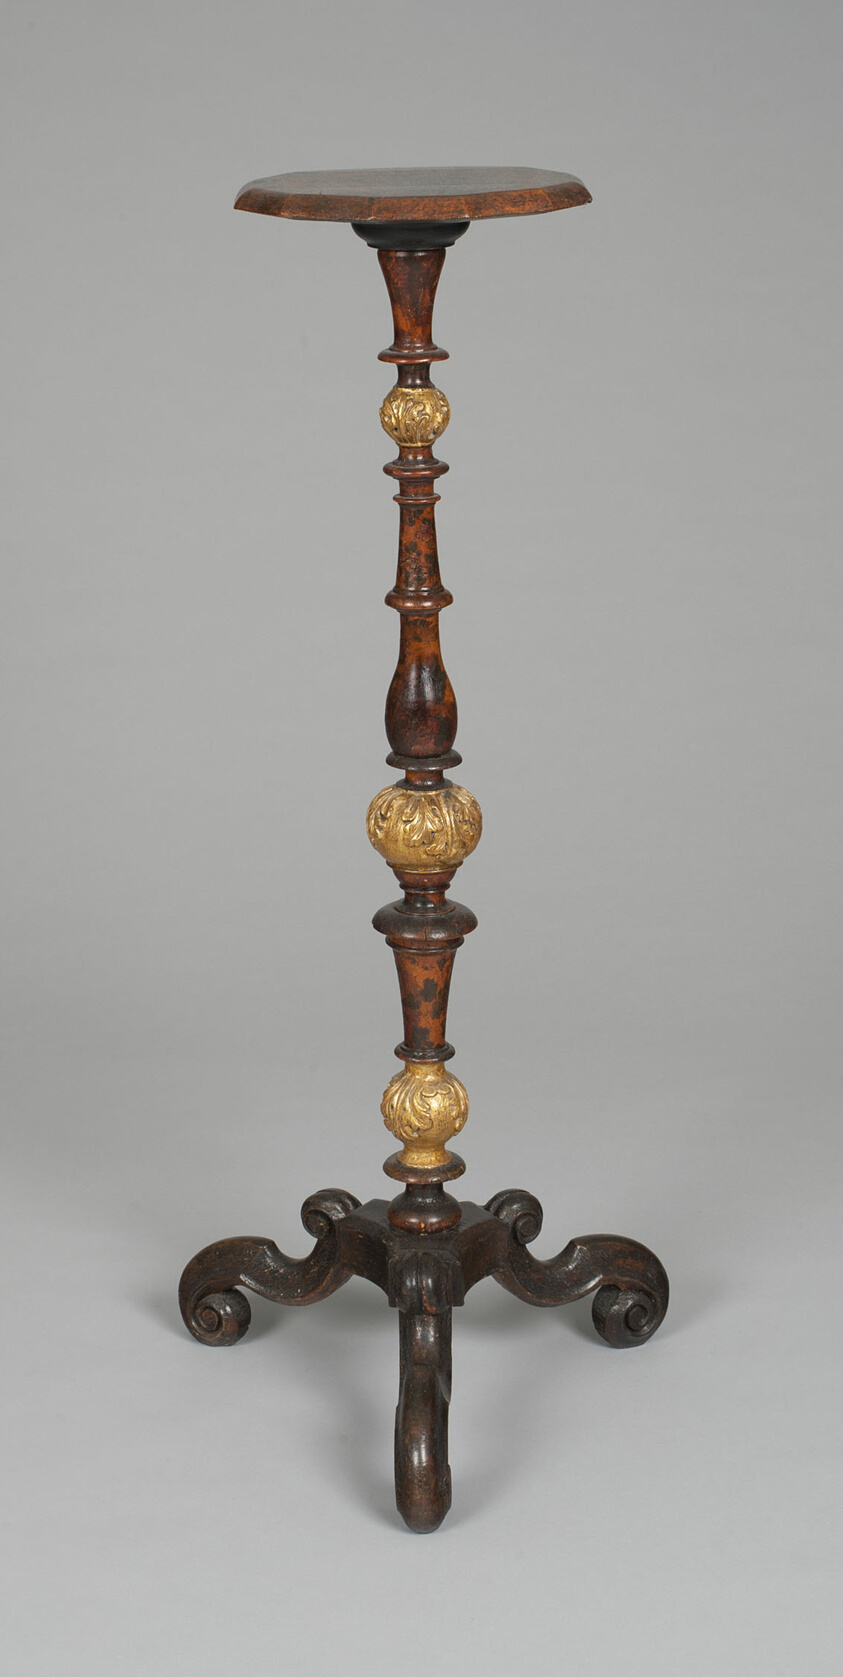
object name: Furniture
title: Candlestand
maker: London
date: 1680/90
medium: Lacquered and gilded wood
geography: London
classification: lighting device; furniture; european decorative arts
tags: furniture